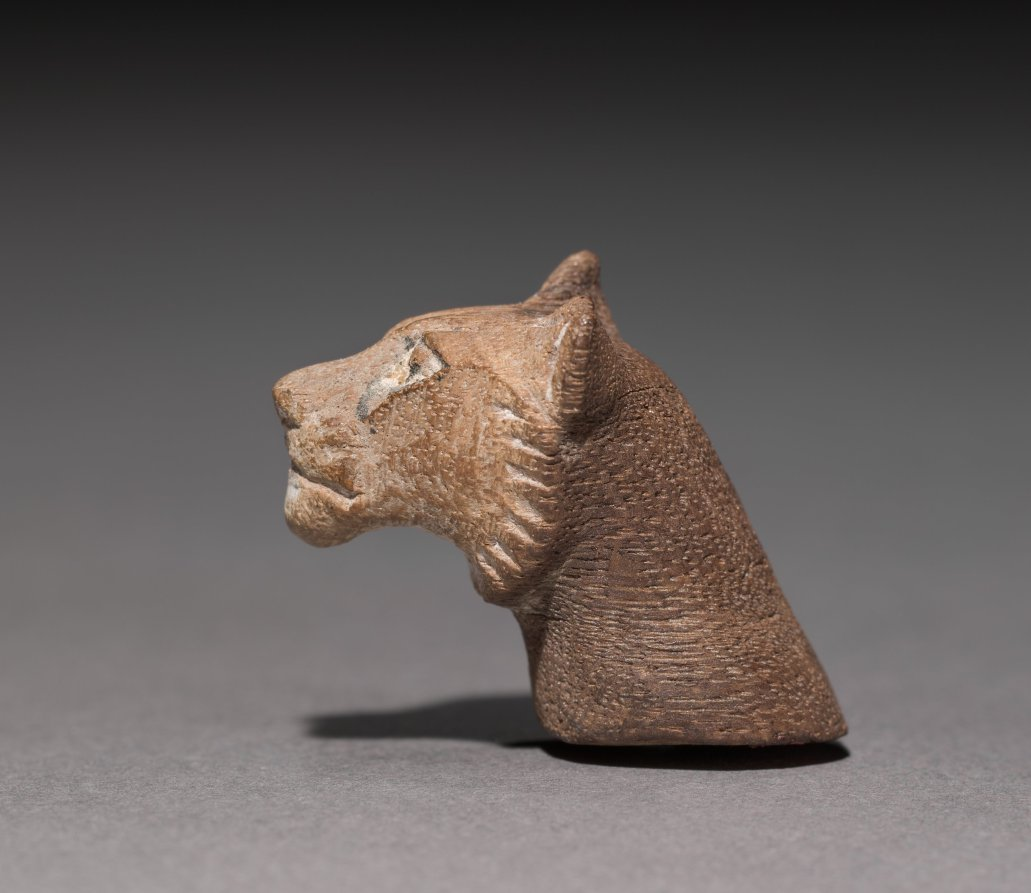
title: Lion Head, perhaps a Steering Oar Butt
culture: Egypt, probably Middle Kingdom (2040–1648 BCE)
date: 2040–1648 BCE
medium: wood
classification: Funerary Equipment